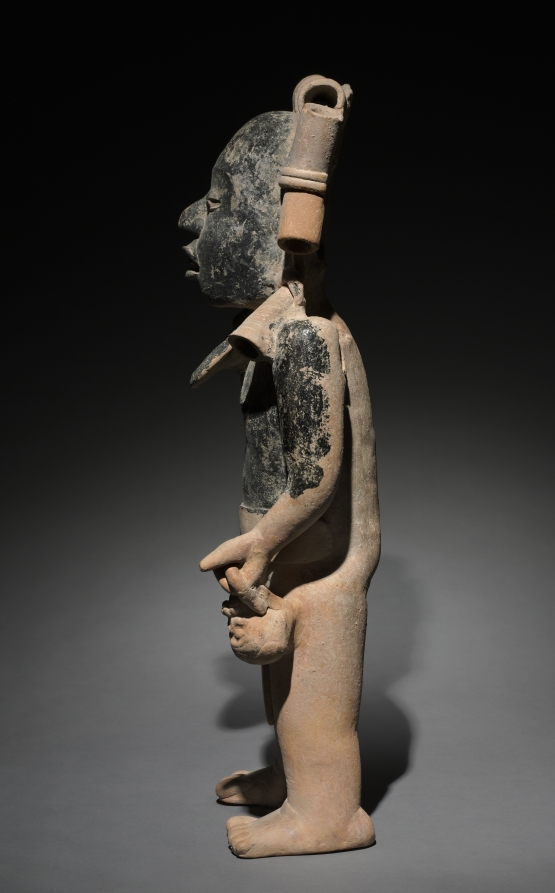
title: Standing Male Figure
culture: Mexico, Gulf Coast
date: 300–900 CE (thermoluminescence date, 240–945 CE)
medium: earthenware, asphalt and resin paint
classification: Sculpture